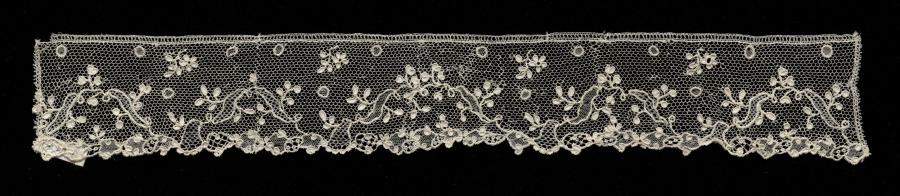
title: Lace Edging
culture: France, Alençon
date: 1740–60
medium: Needle lace (Point d'Alençon)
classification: Lace